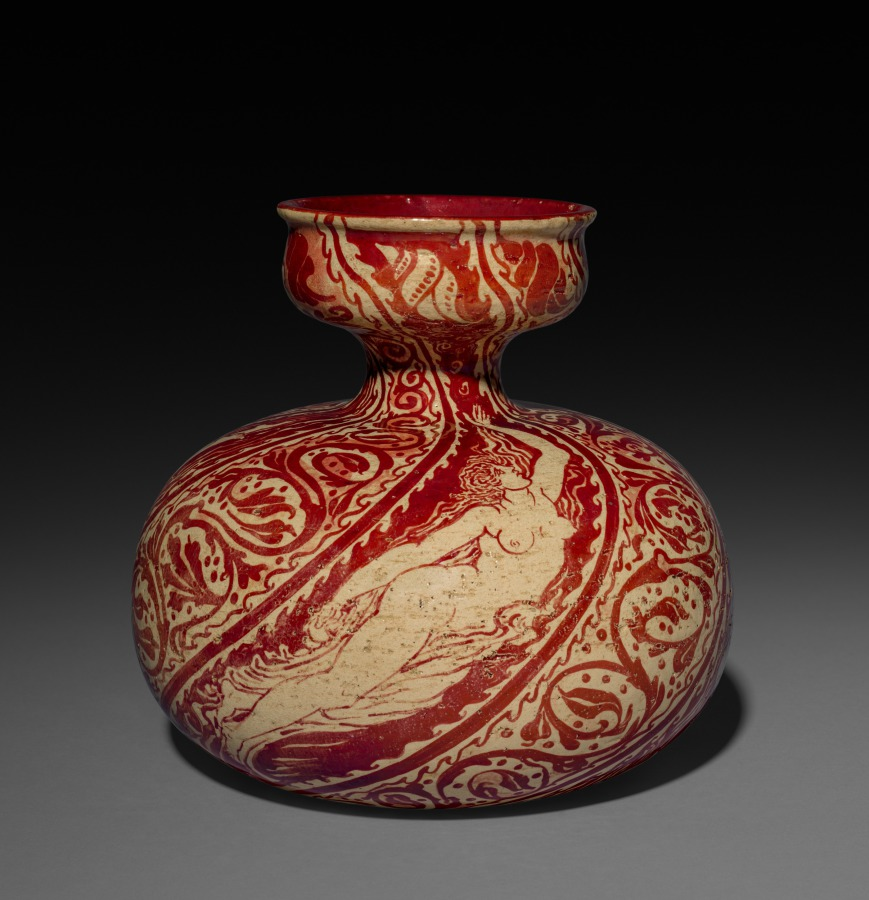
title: Vase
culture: Britain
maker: Walter Crane (British, 1845–1915)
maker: Maw & Co. (British (modern), 1850–1969)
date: 1889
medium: Earthenware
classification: Ceramic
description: Walter Crane was one of the leading figures of the British Arts and Crafts movement. His work helped establish a renewed interest in Renaissance ceramics and the importance of illustration in decorative ceramics. He collaborated with several major manufacturers of decorative furnishings including Maw & Co., an important manufacturer of aesthetic period tiles and other decorative ceramics. This vase is one of a series of vases that Crane designed for Maw around 1889 when they first appear listed in the catalogue of the Arts and Crafts Exhibition Society in London of that year, described along with a series of tiles that Crane also designed for Maw. Its brilliant ruby-red luster surface is a hallmark of Maw’s work featuring Crane’s lyrical designs while referencing earlier 15th- and 16th-century Spanish lusterware.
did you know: The red glaze on this vase resembles the color of oxblood.